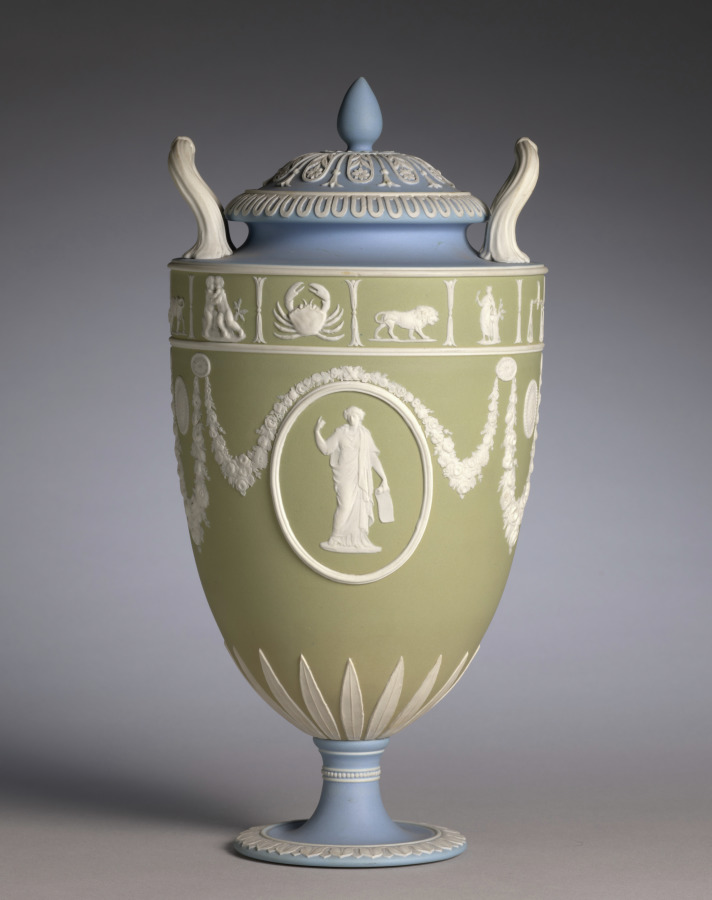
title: Covered Vase (one of a pair)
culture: England, Staffordshire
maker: Josiah Wedgwood and Sons (British, Staffordshire, est. 1759)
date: c. 1850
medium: jasper ware with relief decoration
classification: Ceramic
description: Wedgwood's tricolor jasperware first became popular in the 1770s during a period of fascination with neoclassical decoration. This vase was probably made around 1850 during the period when this type of decoration was revived. The relief medallions depict two versions of the Greek god Apollo, the god of music, next to his harp or lyre.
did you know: Signs of the zodiac form a decorative border around the upper portion of this vase.